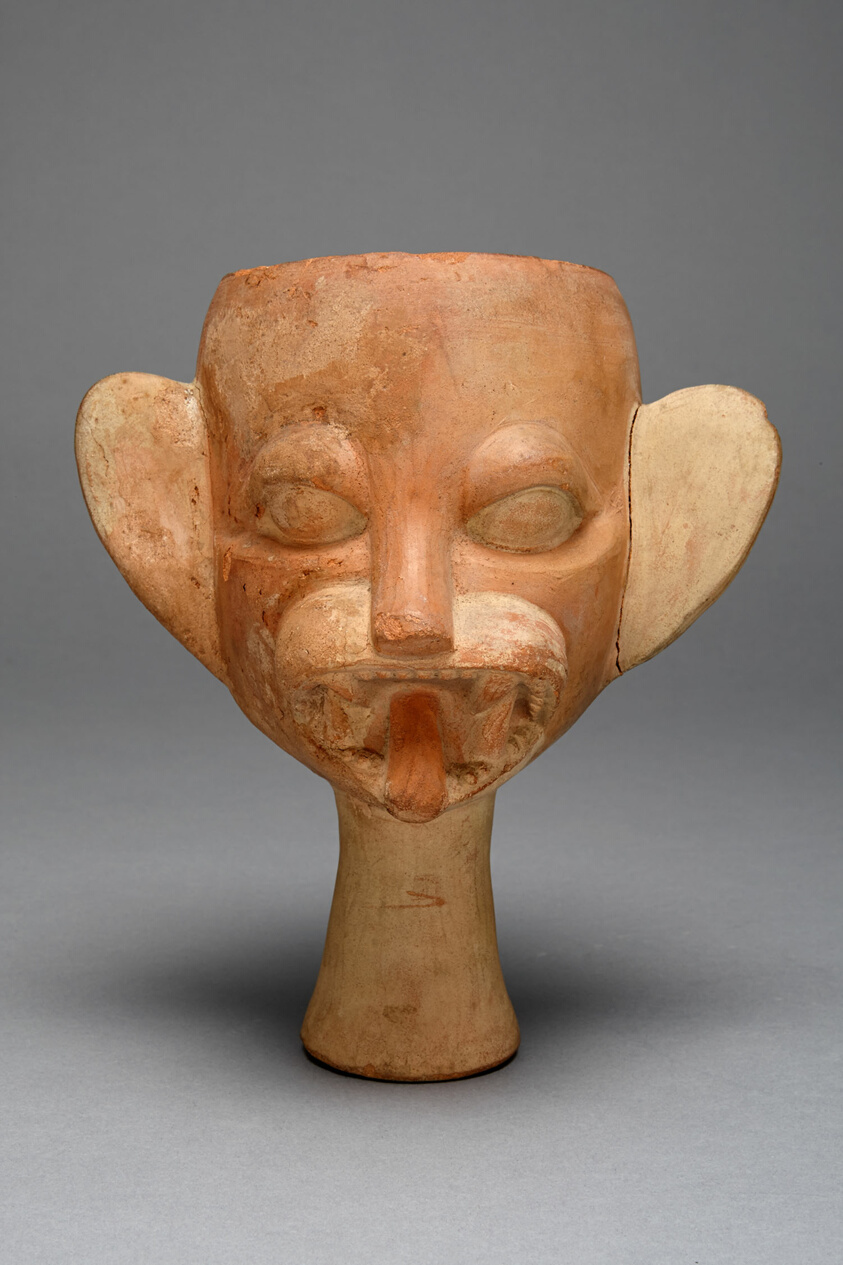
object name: Vessel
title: Cup in the Form of a Feline Head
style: moche, mochica iii, mochica, early intermediate period, Pre-Columbian, americas, Arts of the Americas, andean, andes, south american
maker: Moche (North coast, Peru)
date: 100 BCE–500 CE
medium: Ceramic and pigment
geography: Moche Valley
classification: earthenware; ceramics; vessel; art of the americas